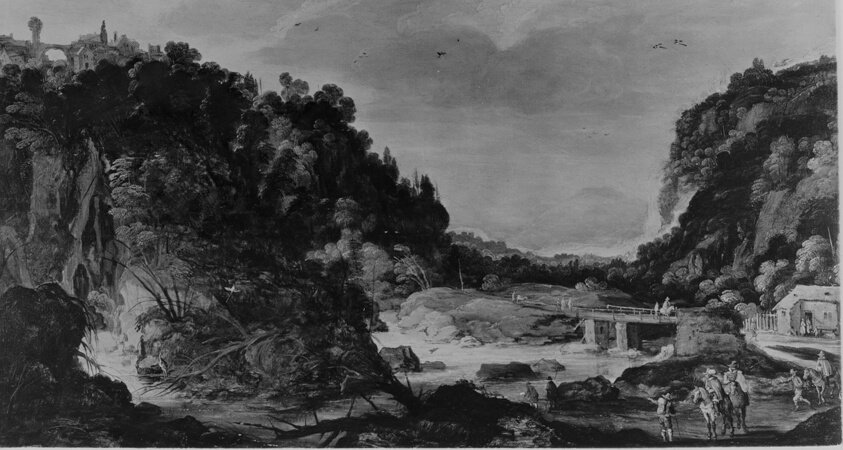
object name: Painting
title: Mountain Landscape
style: 17th Century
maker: Attributed to Joos de Momper, II (Flemish, 1564–1635)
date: 1600/25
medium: Oil on panel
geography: Flanders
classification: oil on panel; paint; oil paintings (visual works); flemish; painting; european painting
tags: landscape, mountain, mountains, figures, people, animals, horse, horses, bridge, water, trees, river, men, women, travel, bushes, rocks, foliage, bird, birds, cranes